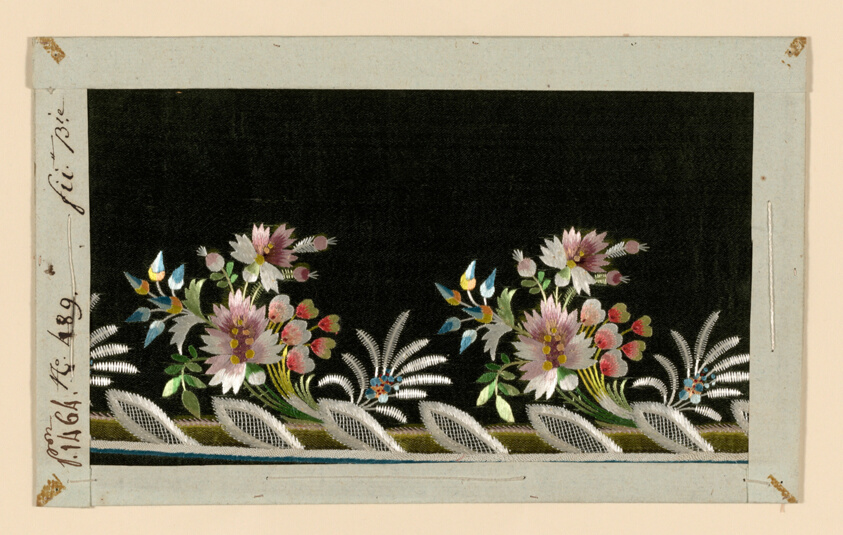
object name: Textile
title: Salesman's Sample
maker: France, possibly Lyon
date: 1780/90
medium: Silk, warp-float faced satin weave; appliquéd with silk, warp-float faced satin weave; embroidered with silk floss and yarns in outline, satin, single satin and stem stitches; couching and French knots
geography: France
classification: textile; needlework (visual works); costume